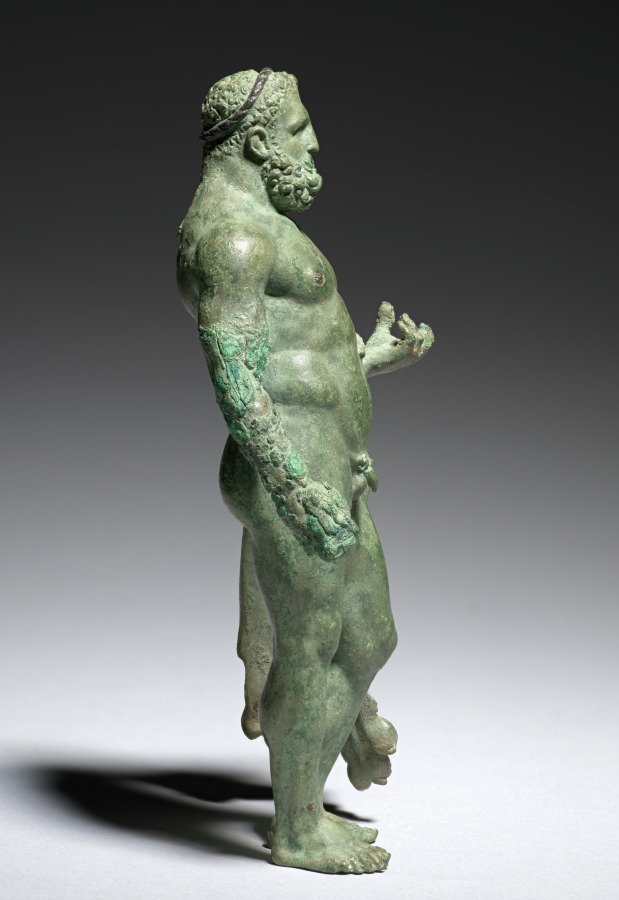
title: Hercules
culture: Italy, Rome, Early Imperial period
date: c. 30 BCE–20 CE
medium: bronze with silver and copper inlays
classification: Sculpture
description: This bronze statuette is a nude figure of the hero Hercules. He stands in a contrapposto pose, with the majority of his weight on one leg. Over his left arm, Hercules holds the skin of the Nemean Lion, having slayed the beast as part of his Twelve Labors and now carrying the pelt as a trophy. Although now mostly lost, Hercules once held his signature wooden club in his right hand. Roman artists often portrayed Hercules as middle-aged, as though greater maturity would increase his power and virility.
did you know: Hercules is the Roman name for the classical hero known in Greek as Herakles.